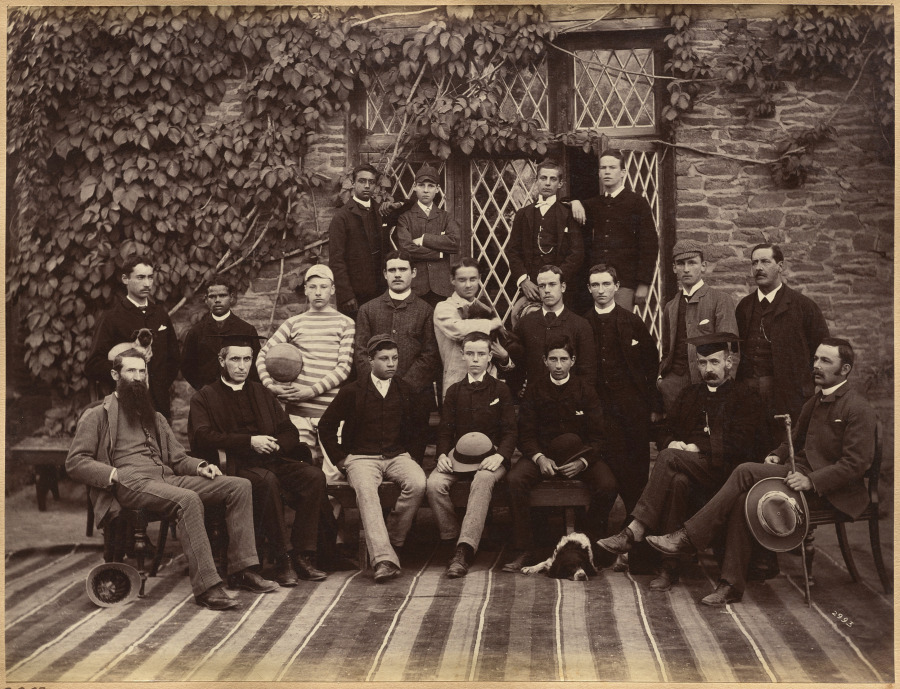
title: High Class Students and Teachers at Bishop Cotton School, Shimla (verso)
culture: India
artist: Raja Deen Dayal (Indian, 1844–1905)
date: c. 1882–87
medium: albumen print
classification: Photograph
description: These photographs are part of an album, now disassembled, of around 105 photographs taken in India between 1885 and summer 1887 that provide glimpses into the lives of the British colonial elite and royal and upper-class Indians. The museum holds another group of 37 pictures from this album (2016.266), which was probably commissioned by a British civil servant visiting or working in India around 1888 as a personal souvenir of his experiences there.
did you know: Raja Deen Dayal is regarded now, and was considered during his lifetime, to be India’s most important 19th-century photographer.